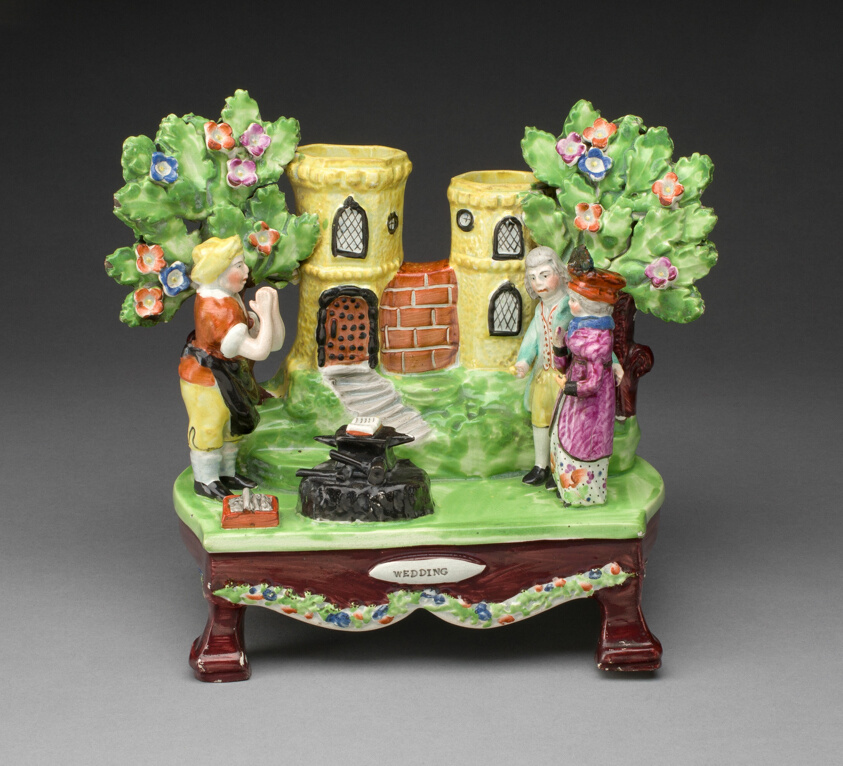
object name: Ceramics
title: Chimney Ornament: Wedding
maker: England, Staffordshire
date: c. 1820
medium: Glazed earthenware with polychrome enamel decoration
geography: Staffordshire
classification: porcelain; ceramics; european decorative arts